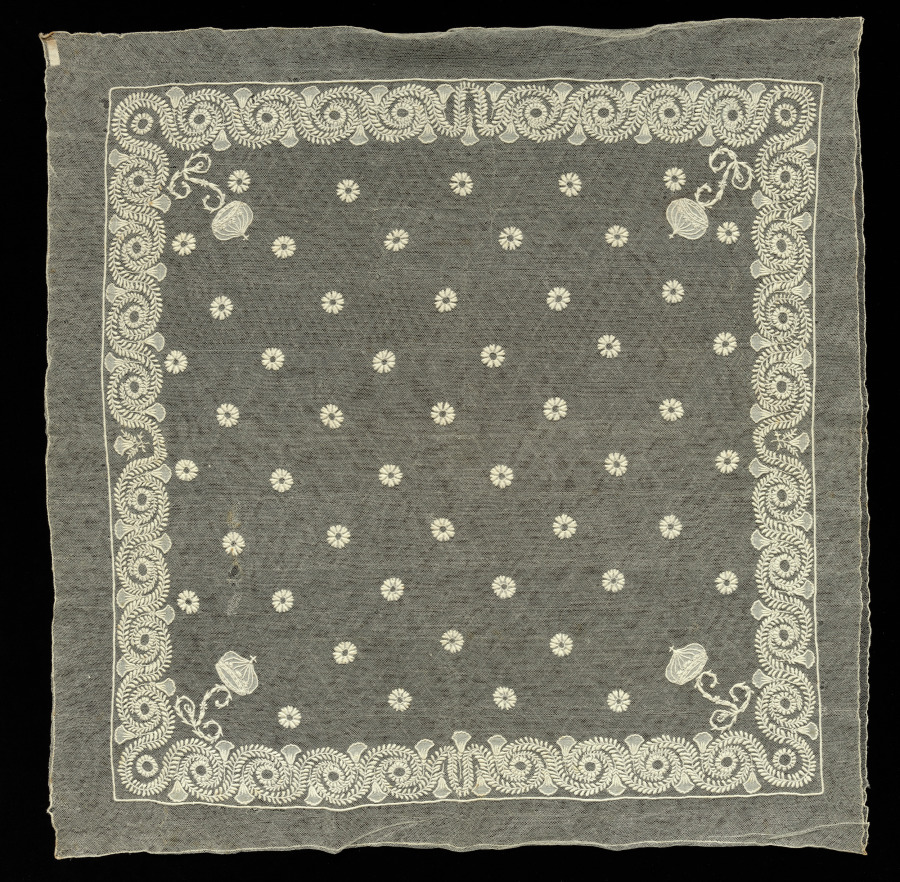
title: Lace Pillow Slip (one of a pair)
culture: France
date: 1804–15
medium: Cotton: machine-made lace net; cotton embroidery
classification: Lace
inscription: in each corner, letter "L."